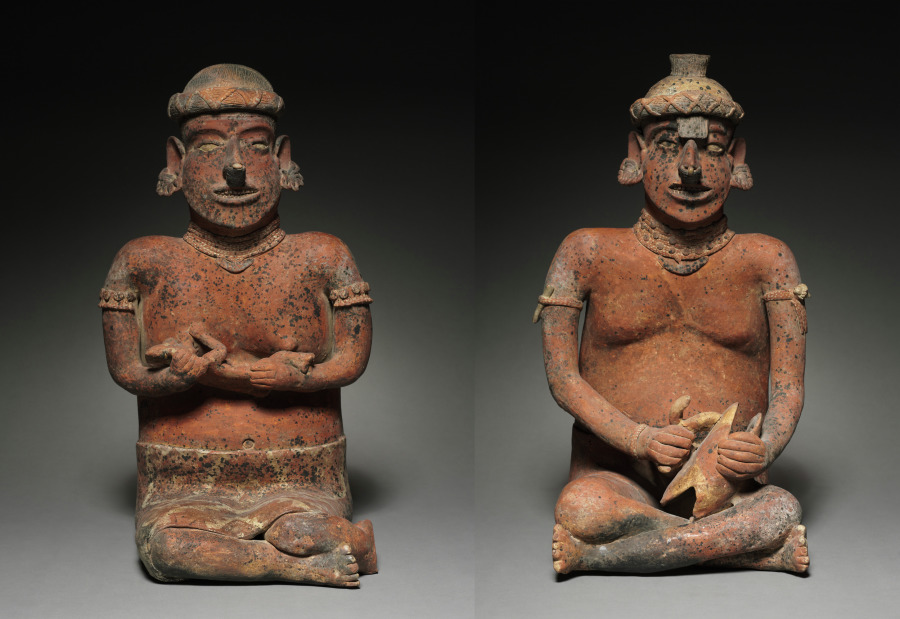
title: Pair of Seated Figures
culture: Mexico, Nayarit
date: 100 BCE–300 CE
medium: ceramic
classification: Ceramic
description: This couple-extremely fine examples of their kind-may commemorate the marriage of an important person, such as a chief, but could also represent siblings of a chiefly family. Whatever their relationship, their unity is conveyed by their physical similarities, including their jewelry, which marks high social station. The female is unusual in nursing an infant, likely a reference to generational renewal and the continuation of noble bloodlines. The significance of the male’s activity-beating a turtle-shell drum- is not understood.